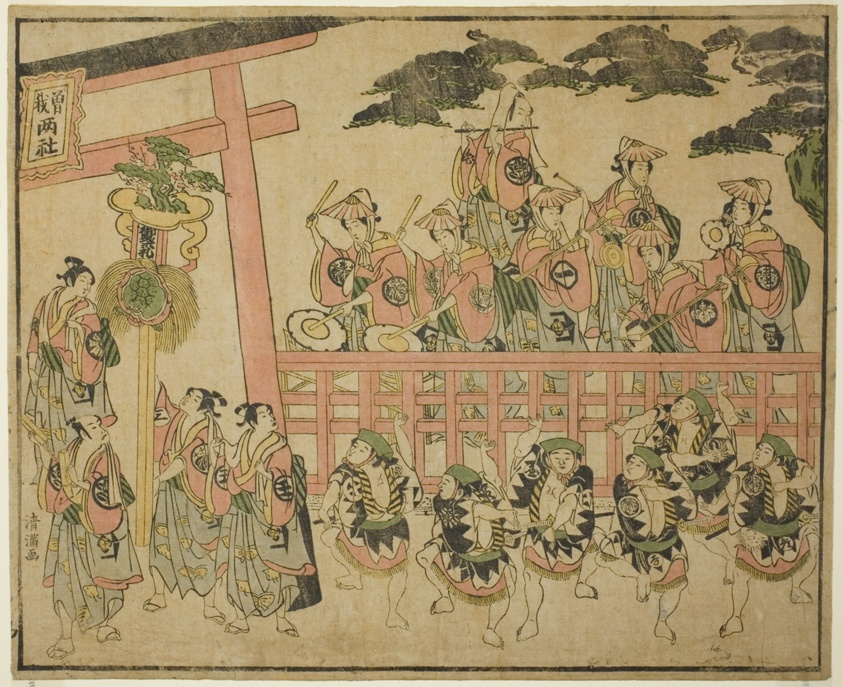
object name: Print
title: The Soga Festival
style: Japanese (culture or style)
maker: Torii Kiyomitsu I (Japanese, 1735-85)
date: c. 1768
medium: Color woodblock print; benizuri-e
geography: Japan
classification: woodblock print; print; asian art